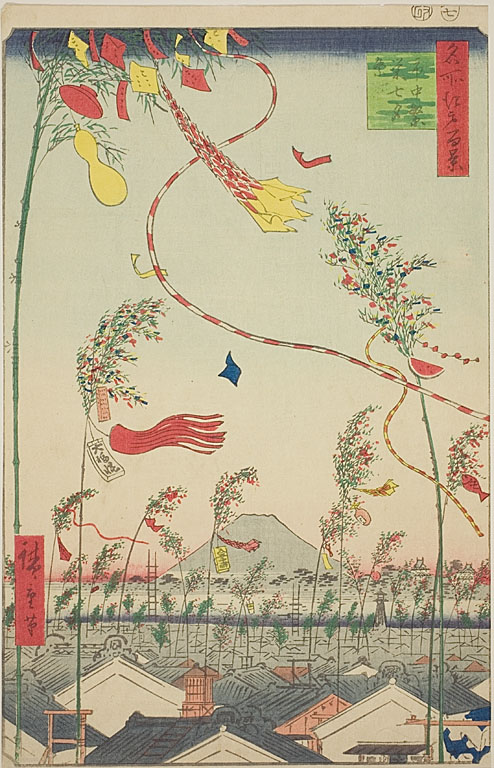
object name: Print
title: The City Flourishing, Tanabata Festival (Shichu han'ei Tanabata Matsuri), No.73 from the series "One Hundred Famous Views of Edo (Meisho Edo hyakkei)"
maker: Utagawa Hiroshige (Japanese, 1797-1858)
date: 1857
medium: Color woodblock print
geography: Japan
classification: woodblock print; print; asian art